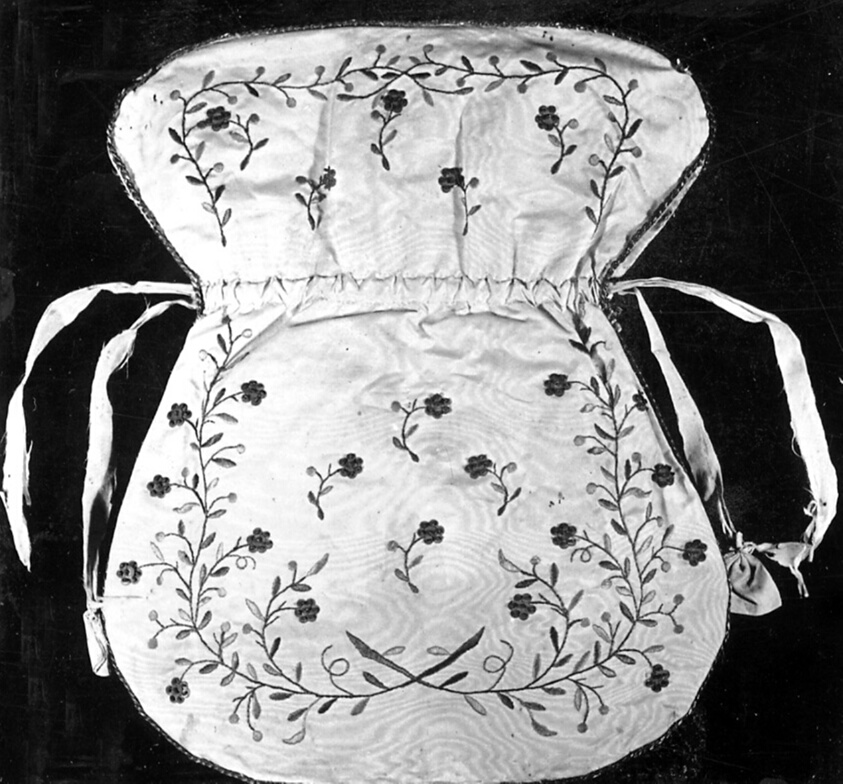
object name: Costume and Accessories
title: Bag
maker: England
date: 18th century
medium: Silk, plain weave, warp-faced, moiré treatment; embroidered in silk floss, spangles, purl, metal strip wrapped on silk core; stem and satin stitches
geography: England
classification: textile; bag - needlework; costume accessory - bag; costume accessory; costume; dress (garment); clothing